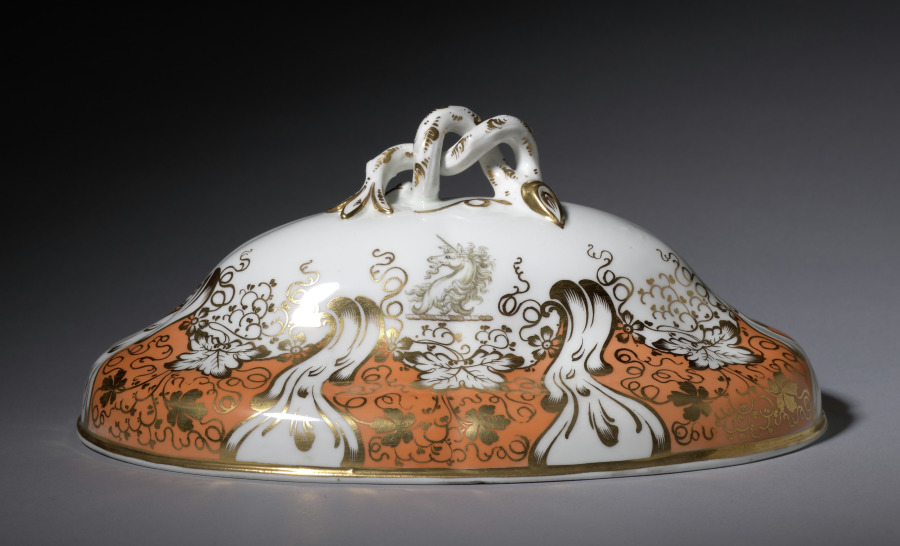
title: Vegetable Dish (lid)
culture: England, Staffordshire, early 19th century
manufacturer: Davenport Pottery and Porcelain Factory (British)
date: early 1800s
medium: ceramic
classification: Ceramic